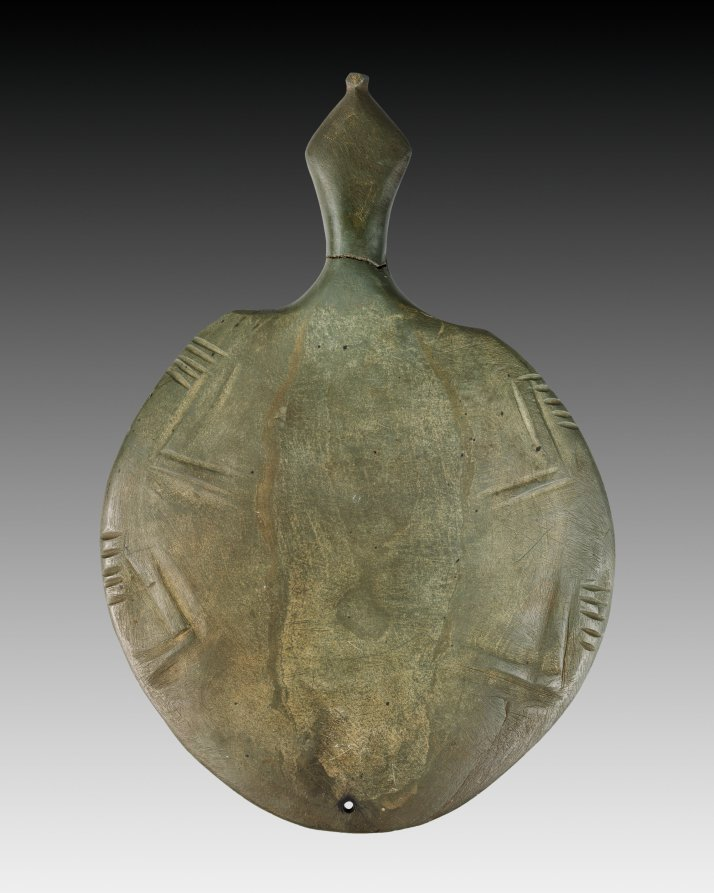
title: Palette in the Form of a Turtle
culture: Egypt, Modern forgery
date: Forgery of the early 20th Century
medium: slate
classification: Implements